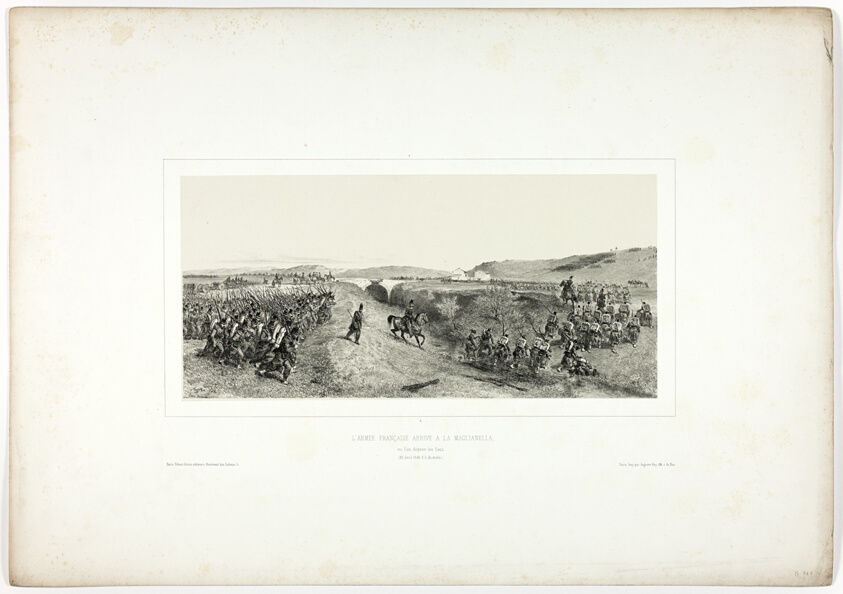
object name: Print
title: The French Army Arrives at Maglianella, from Souvenirs d’Italie: Expédition de Rome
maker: Denis Auguste Marie Raffet (French, 1804-1860); printed by Auguste Bry (French, 19th century); published by Chez Gihaut Frères (French, 19th century)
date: 1850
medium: Lithograph in black on buff wove chine laid down on ivory wove paper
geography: France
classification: lithograph; print; prints and drawing